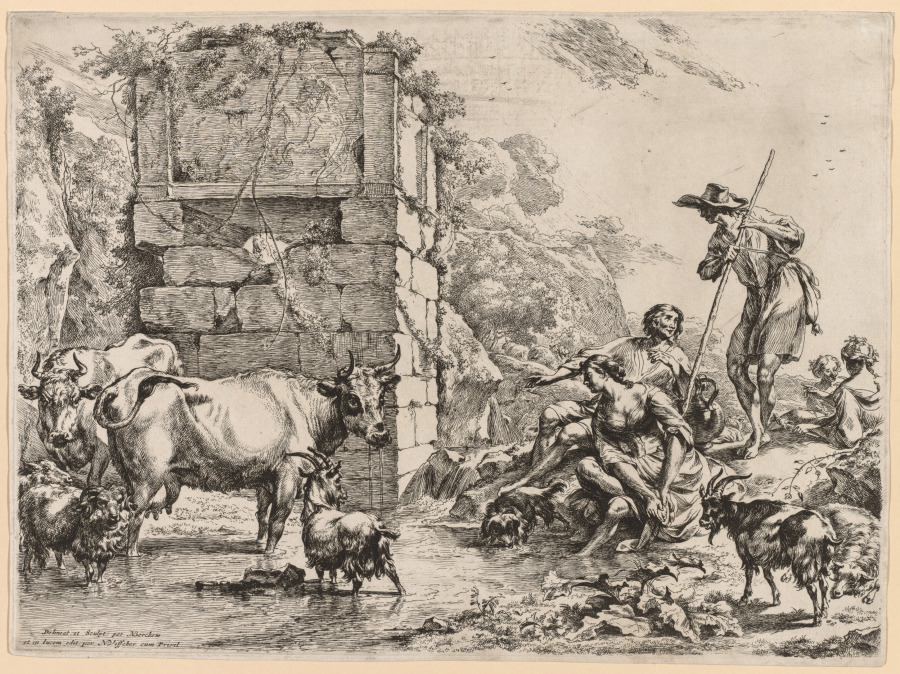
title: The Cow Drinking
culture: Netherlands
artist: Nicolaes Berchem (Dutch, 1620–1683)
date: 1680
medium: etching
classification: Print